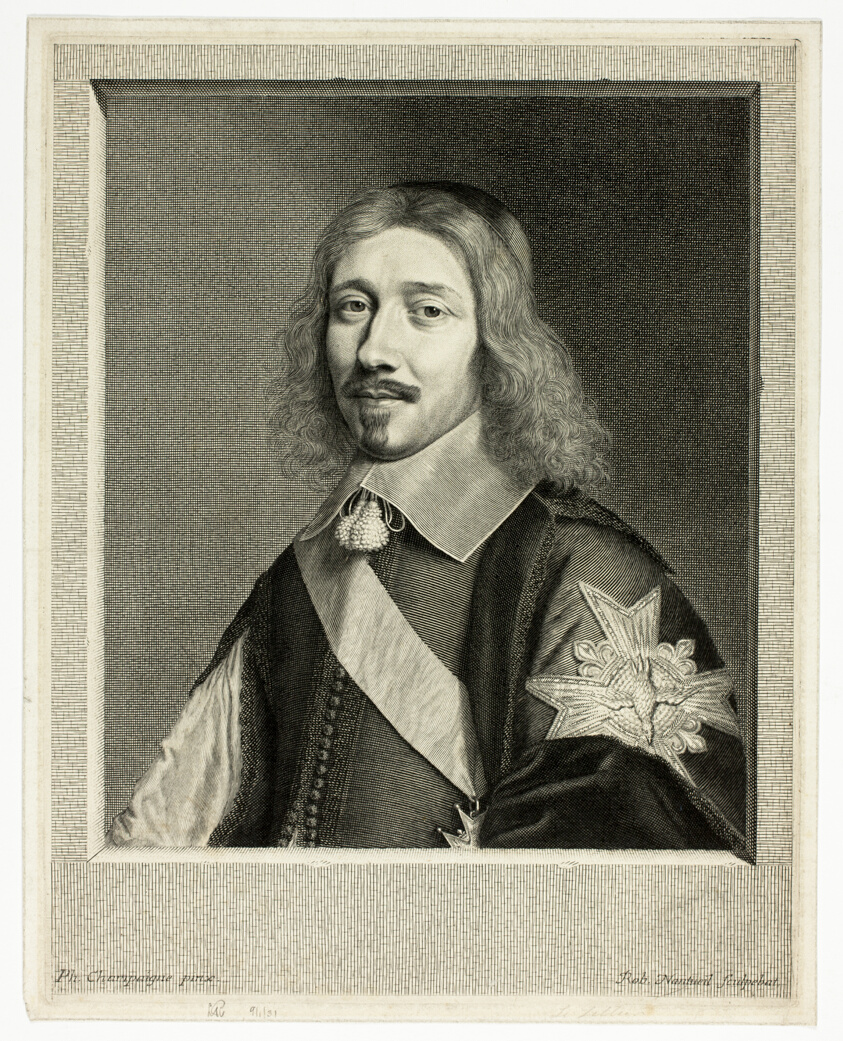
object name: Print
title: Portrait of Michel Le Tellier, Minister of State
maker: Robert Nanteuil (French, 1623-1678); after Philippe de Champaigne (French, 1602-1674)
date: 1653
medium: Engraving on ivory laid paper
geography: France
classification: engraving; print; prints and drawing